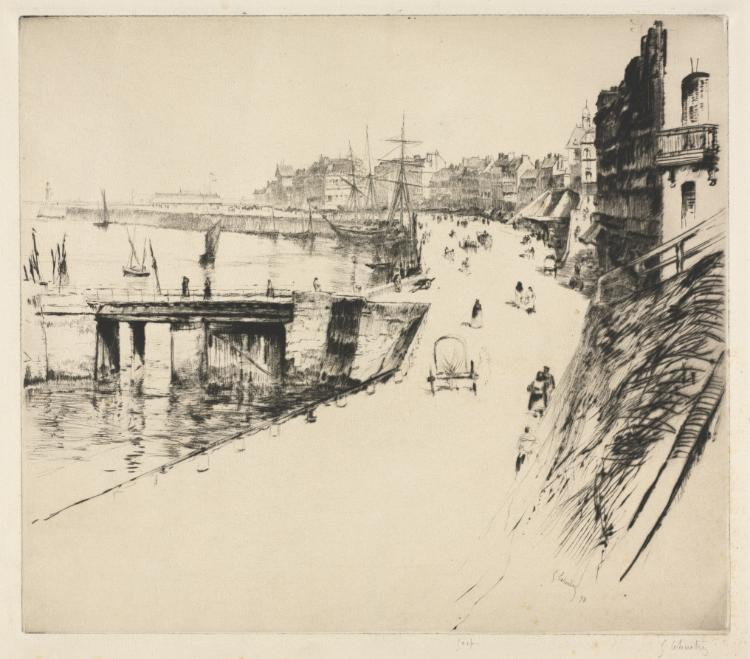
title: The Dam of Treport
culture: France, 19th-20th century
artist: Gustave Leheutre (French, 1861–1932)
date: c. 1880–1920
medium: drypoint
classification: Print